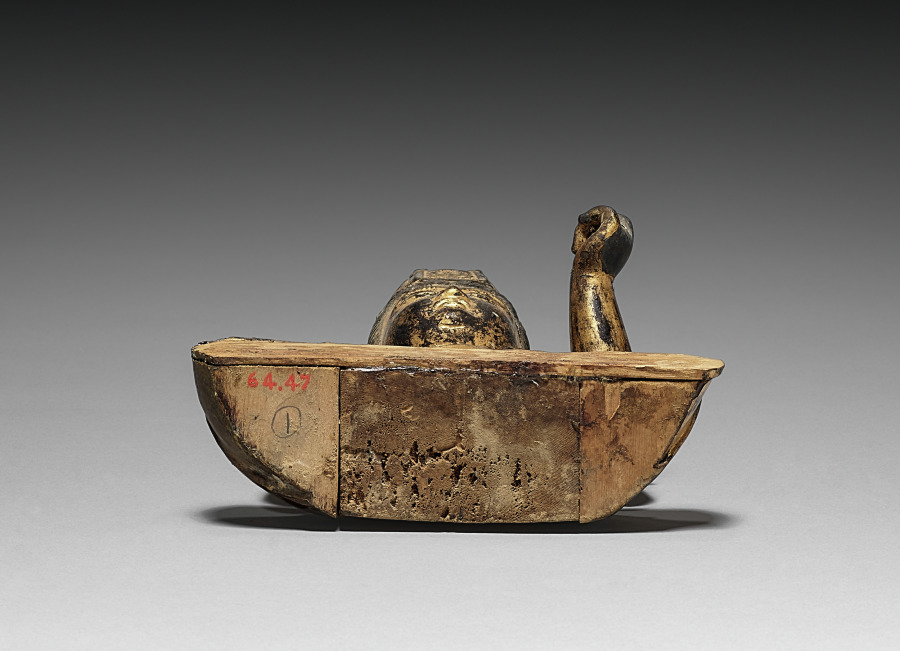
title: Bodhisattva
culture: Japan, Heian period (794–1185)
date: 900s–1100s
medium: gilded wood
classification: Sculpture